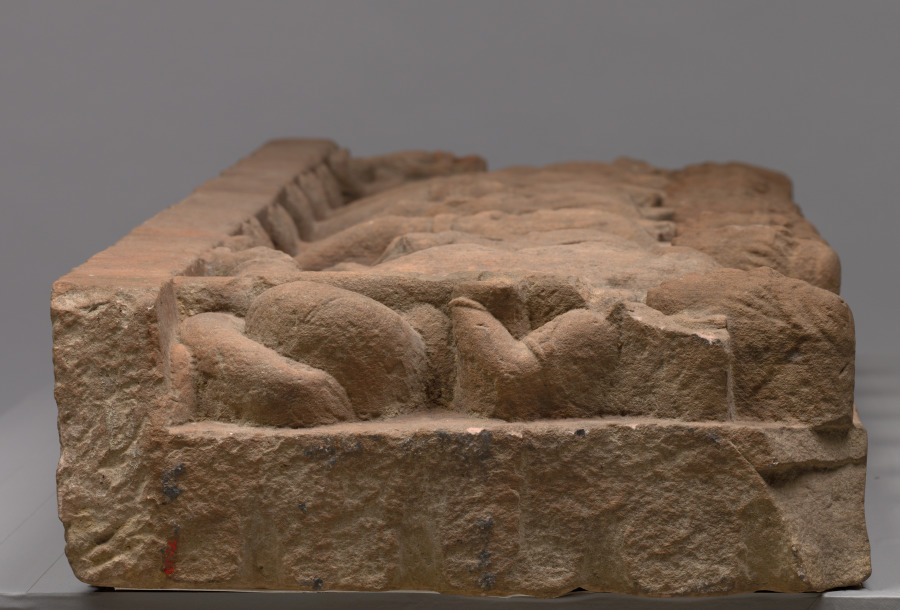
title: Nine Celestial Bodies (Navagraha)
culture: Central India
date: 700s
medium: Sandstone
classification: Sculpture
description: Near temple entrances, the nine celestial bodies were depicted in an orderly row, often in figural form. From left to right they are: Sun with a tall crown and the female Dawn in front of him. The next five figures are nearly identical: Moon, Mercury, Venus, Mars, and Jupiter. As a portent of doom, Saturn was wounded by a goddess to prevent him from moving swiftly, so he stands on one leg. The bodiless head is Rahu, the eclipse, who swallows the moon until it falls out his neck. The serpent-tailed figure is a comet.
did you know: The Sun (Surya) is the only figure who wears boots and holds fully open lotus flowers.